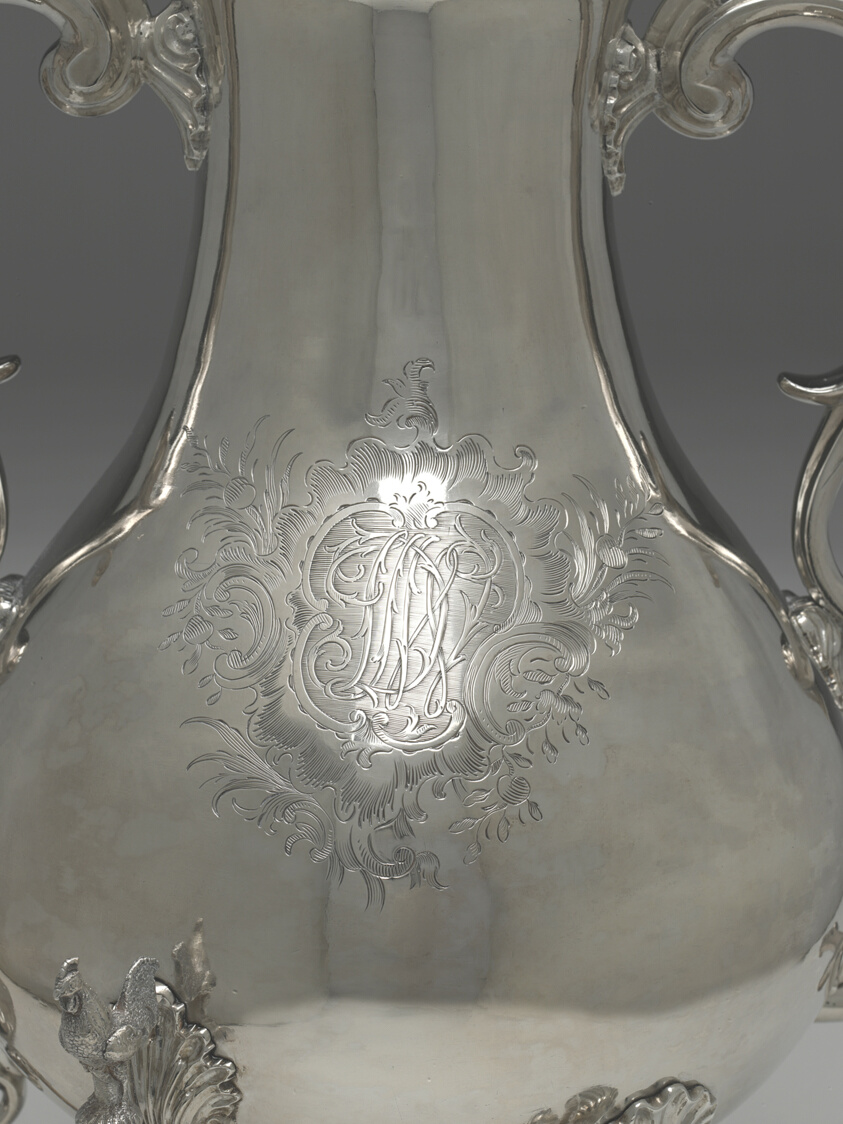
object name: Metalwork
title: Urn with Cover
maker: Ephraim Brasher; American, 1744–1810; New York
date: c. 1770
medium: Silver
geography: New York City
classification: vessel for serving drinks; silver; american decorative arts; american arts; decorative arts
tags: dining, drinking